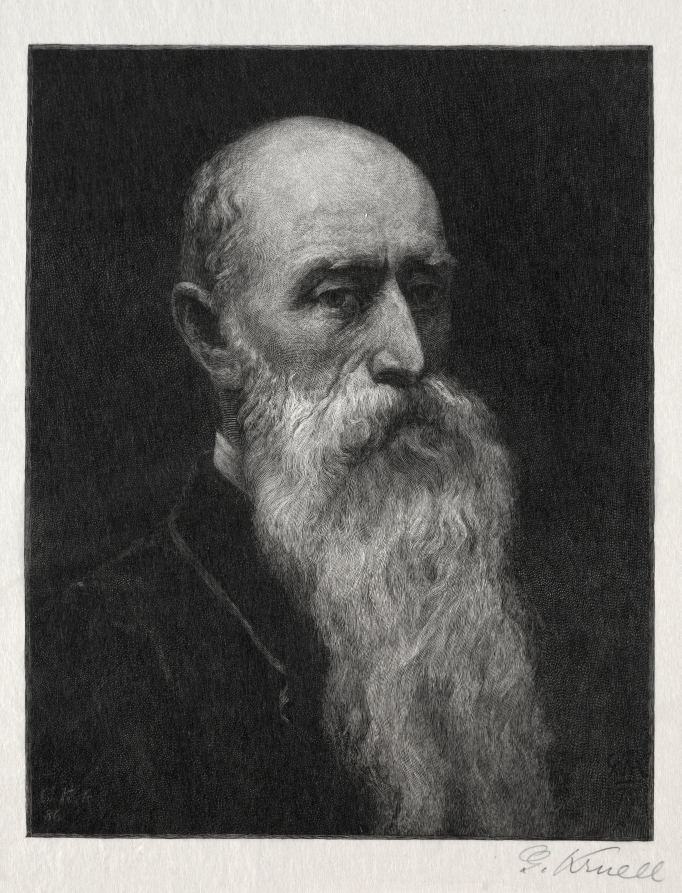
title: William Morris Hunt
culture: America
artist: Gustav Kruell (American, 1843–1907)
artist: after William Morris Hunt (American, 1824–1879)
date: 1887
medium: wood engraving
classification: Print